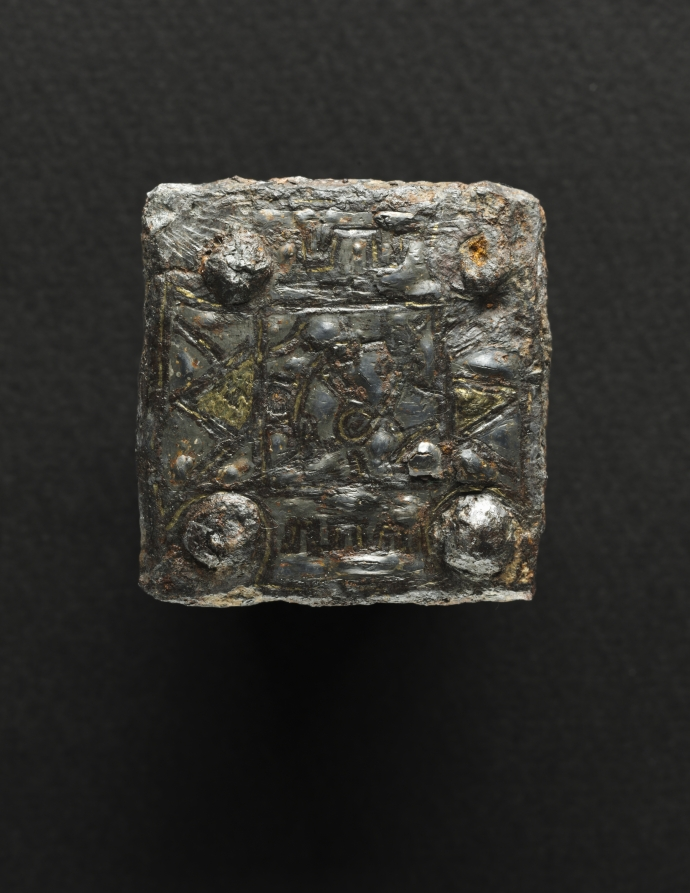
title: Belt Plate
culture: Frankish, Migration period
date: 600s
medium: iron with silver overlay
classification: Jewelry